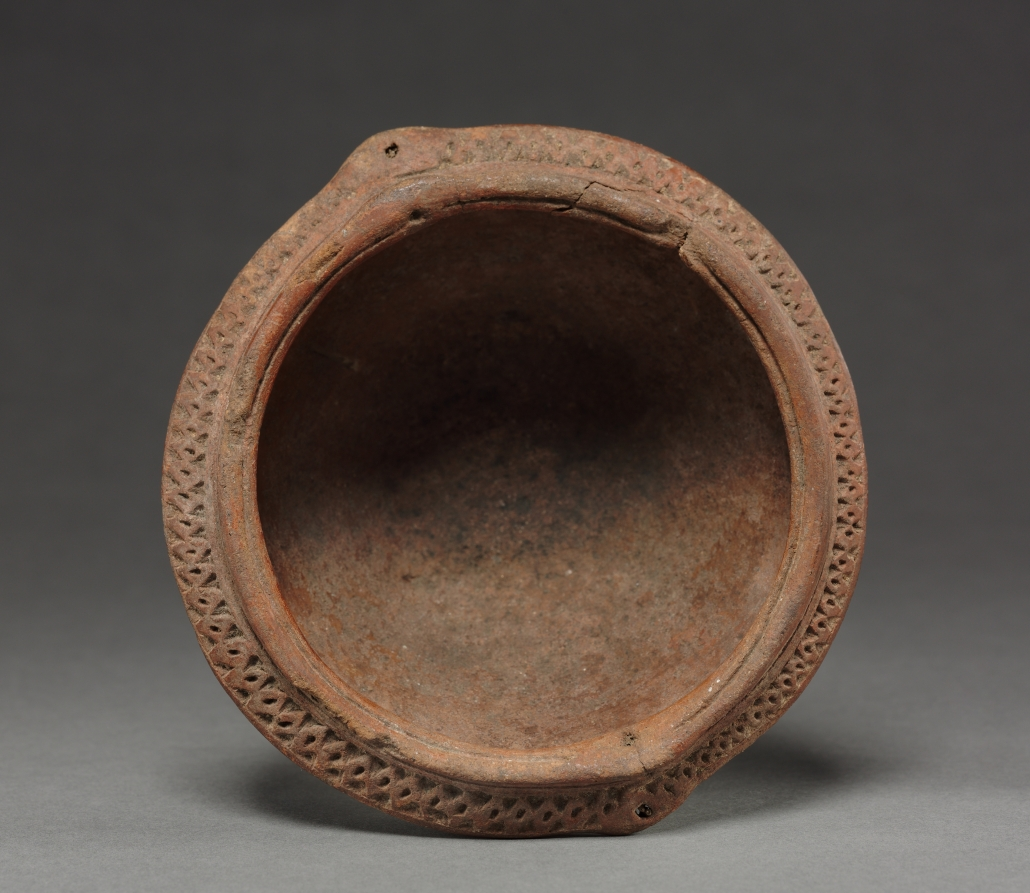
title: Jar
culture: Colombia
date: before 1550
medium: red ware with incised patterns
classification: Ceramic